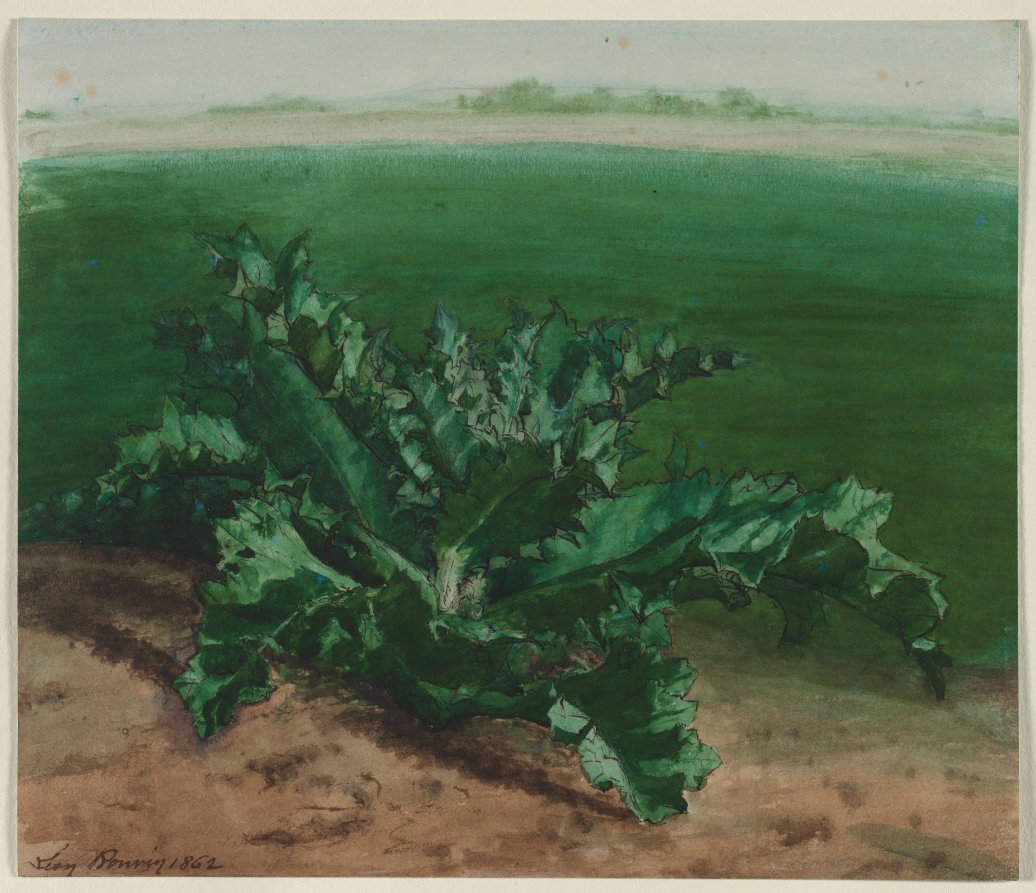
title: Study of a Plant, Possibly Thistle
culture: France, 19th century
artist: Léon Bonvin (French, 1834–1866)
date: 1862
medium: Watercolor and pen and brown ink with white heightening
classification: Drawing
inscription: signed, lower left, in brown ink: Léon Bonvin 1862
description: Neglected within his own time, the watercolors of Bonvin have only come to be fully appreciated in the late 20th century. An artist with little formal training, Bonvin earned a living working in his family’s inn in Vaugirard, on the outskirts of Paris. The landscape near his home and studies of the inn’s garden became his themes.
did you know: This watercolor was made after the year of Léon Bonvin's marriage, a time when he was increasingly trying to make a living from his art.